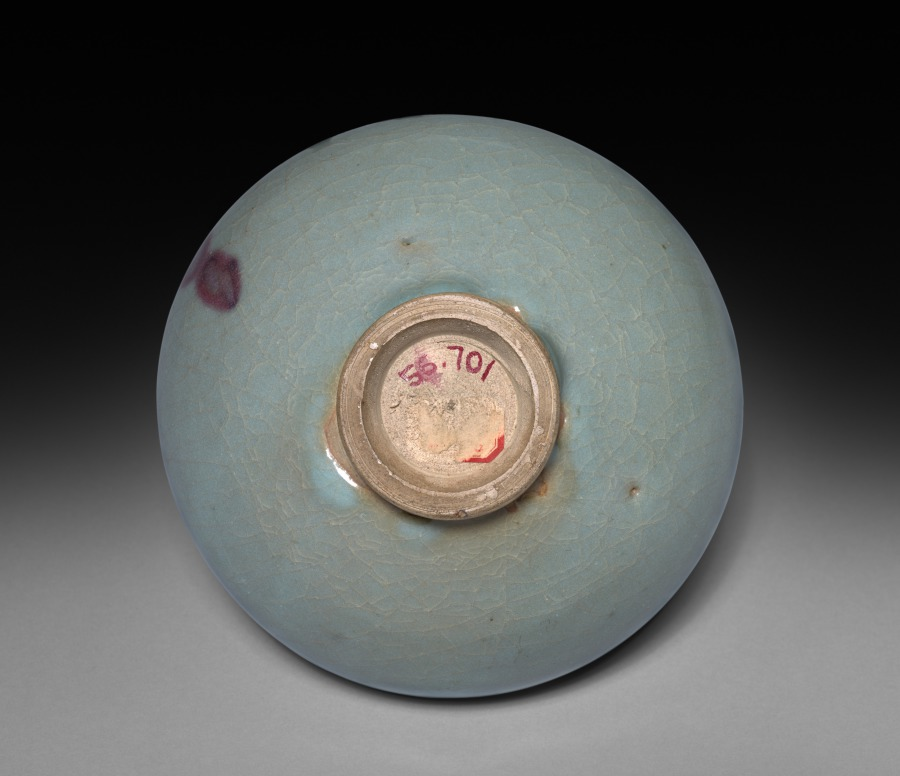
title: Bowl: Jun ware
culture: Northern China, Jin dynasty (1115-1234) - Yuan dynasty (1271-1368)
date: Jin dynasty (1115–1234) - Yuan dynasty (1271–1368)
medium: glazed buff stoneware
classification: Ceramic